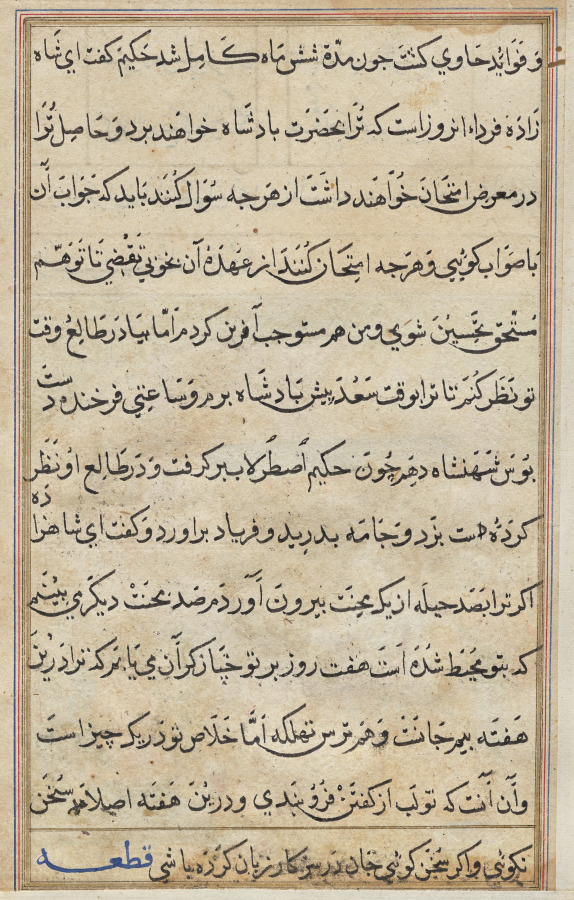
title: Page from Tales of a Parrot (Tuti-nama): text page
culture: Mughal India, court of Akbar (reigned 1556–1605)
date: c. 1560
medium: gum tempera, ink, and gold on paper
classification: Painting